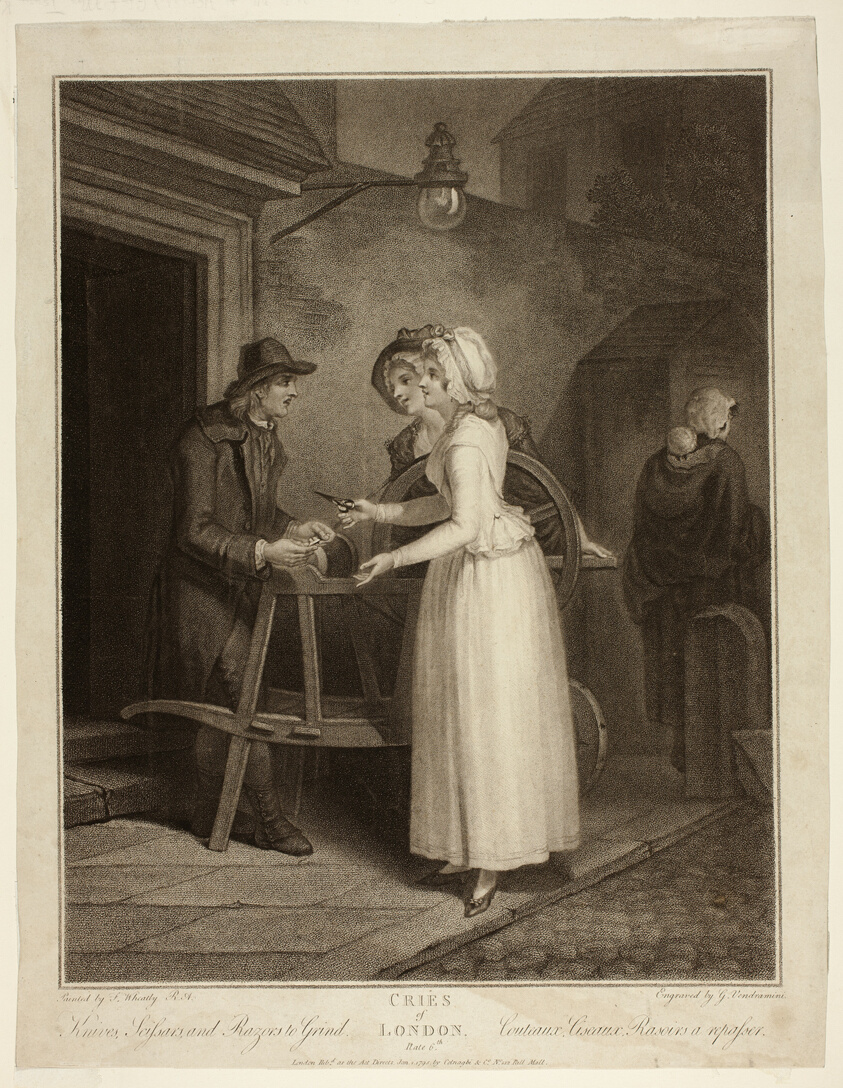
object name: Print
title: Knives, Scissars, and Rotors to Grind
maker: Giovanni Vendramini (Italian, 1769-1839); after Francis Wheatley (English, 1747-1801)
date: January 1795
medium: Stipple engraving in brown on cream laid paper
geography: Italy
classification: engraving; print; prints and drawing